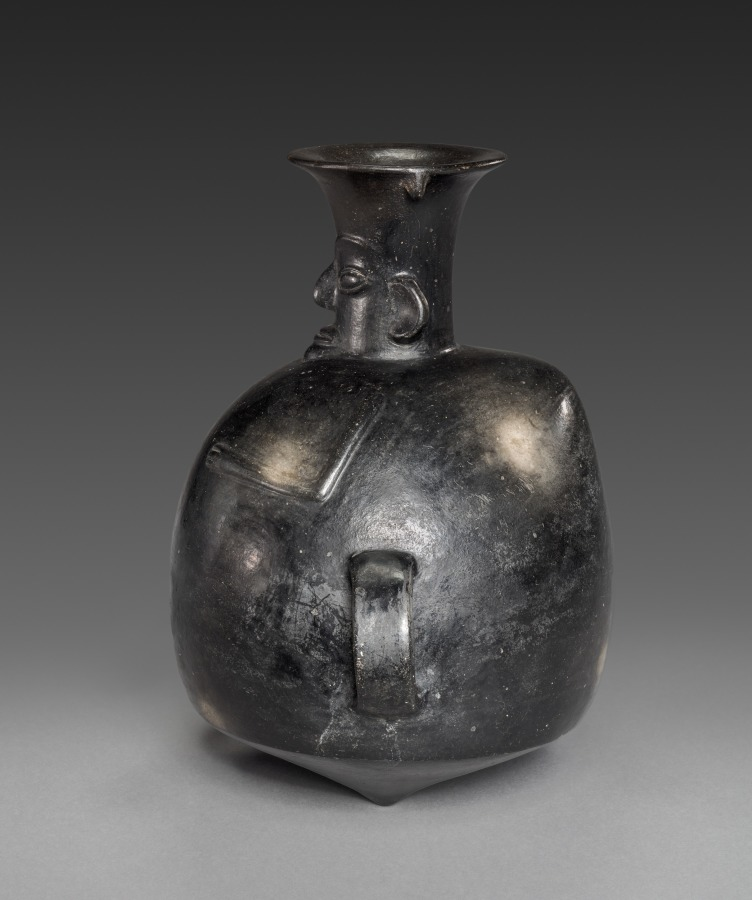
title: Hunchback Vessel (Aryballos)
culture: Central Andes (Peru), Chimú-Inka style, Late Horizon period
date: 1470–1521 (Thermoluminescence date, 1315–1615)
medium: ceramic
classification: Ceramic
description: This handsome vessel, along with the nearby double-chambered vessel, were made on the north coast after the Inka conquered the Chimú in the 1460s. Under Inka rule, many aspects of Chimú ceramic technology continued but new forms and subjects were introduced, such as the aryballos, a classic Inka vessel type. This example takes the form of a hunchback and may refer to the Inka predilection for employing hunchbacks as royal servants.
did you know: Hunchbacks seem to have functioned as servants in Inka royal palaces.